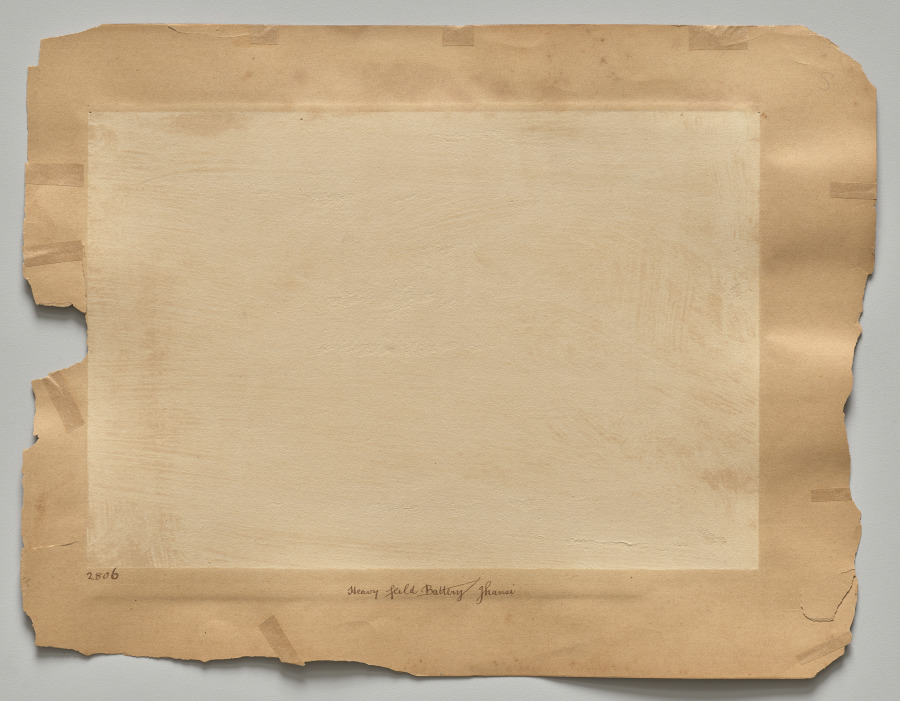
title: Bullocks of Elephant Battery, Jhansi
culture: India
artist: Raja Deen Dayal (Indian, 1844–1905)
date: c. 1882–87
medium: albumen print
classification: Photograph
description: These photographs are part of an album, now disassembled, of around 105 photographs taken in India between 1885 and summer 1887 that provide glimpses into the lives of the British colonial elite and royal and upper-class Indians. The museum holds another group of 37 pictures from this album (2016.266), which was probably commissioned by a British civil servant visiting or working in India around 1888 as a personal souvenir of his experiences there.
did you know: Raja Deen Dayal is regarded now, and was considered during his lifetime, to be India’s most important 19th-century photographer.